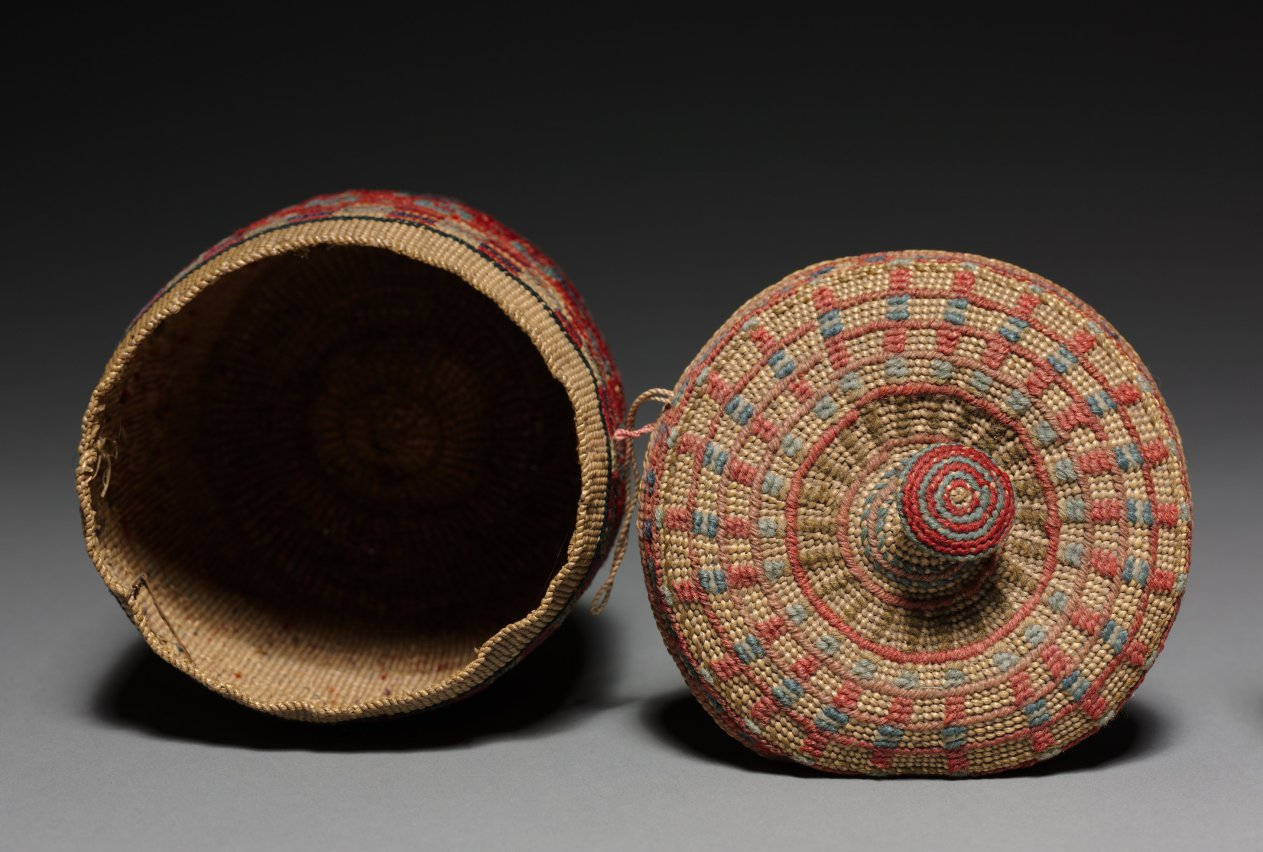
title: Covered Basket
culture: Arctic, Aleut, late 19th-early 20th century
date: late 1800s–early 1900s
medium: wool embroidery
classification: Basketry